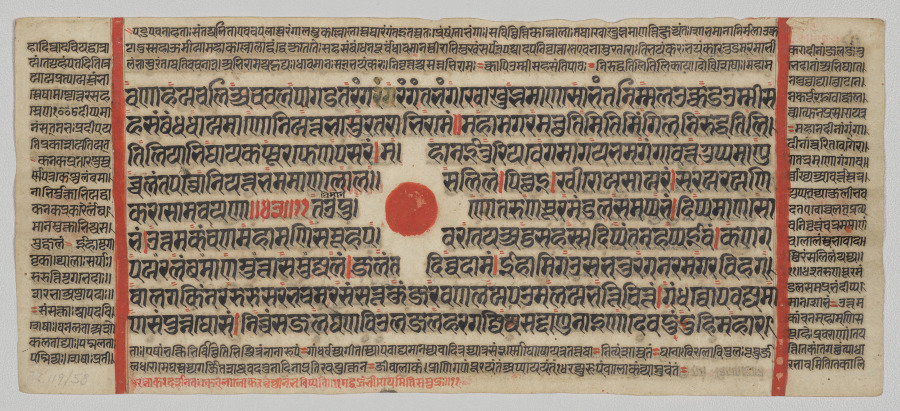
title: Text, Folio 18 (recto), from a Kalpa-sutra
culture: Western India, Gujarat, last quarter of the 15th century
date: c. 1475–1500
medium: Gum tempera, ink, and gold on paper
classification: Painting